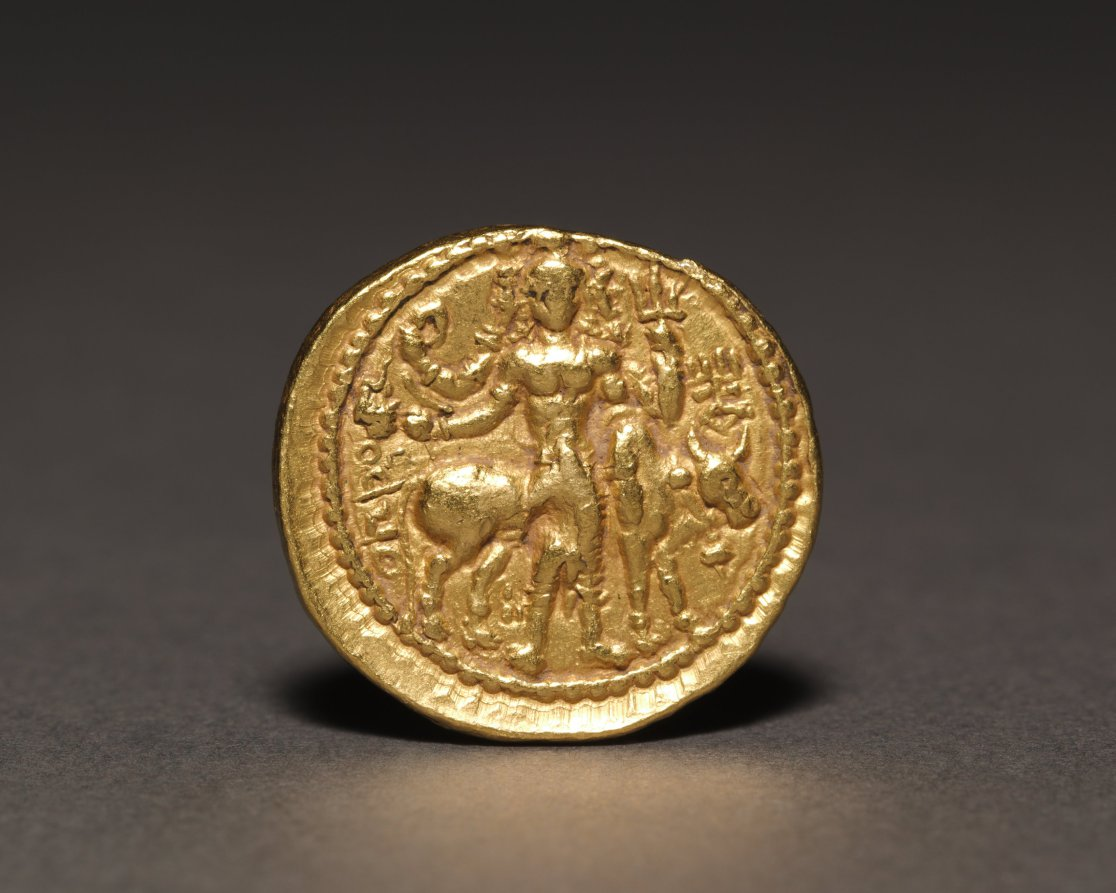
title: Coin of Kushan King Vasudeva I (reverse)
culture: India, Mathura, Kushan period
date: c. 142/145+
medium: gold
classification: Coins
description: This gold coin represents the reign of the Kushana ruler, Vasudeva I. The coin bears a portrait of the ruler on the obverse and various deities on the reverse. It is identified by inscriptions in Kharosthi, the language used in northwestern India during the Kushan period.